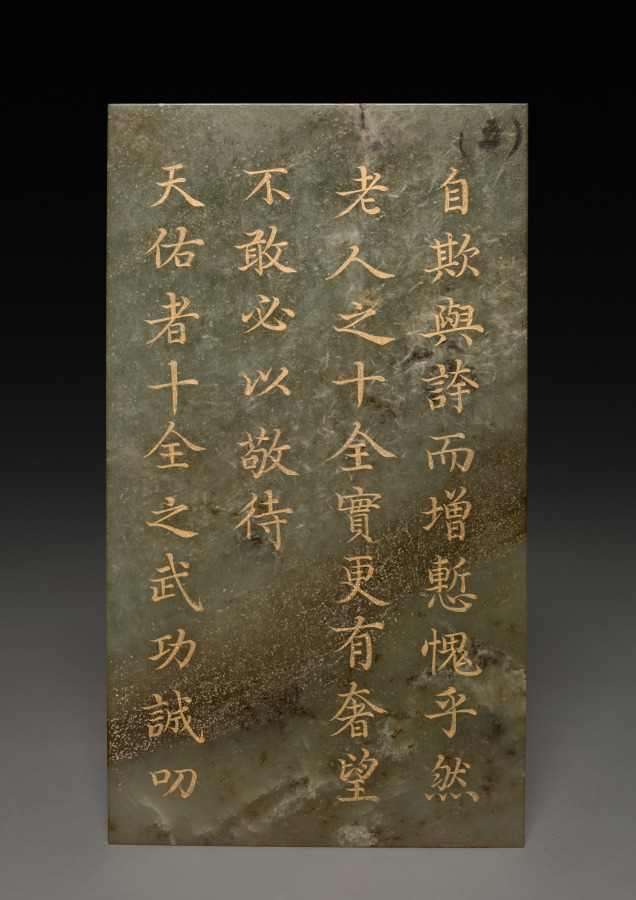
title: Tablet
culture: China, Qing dynasty (1644–1911), Qianlong reign (1736–95)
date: 1778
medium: jade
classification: Jade